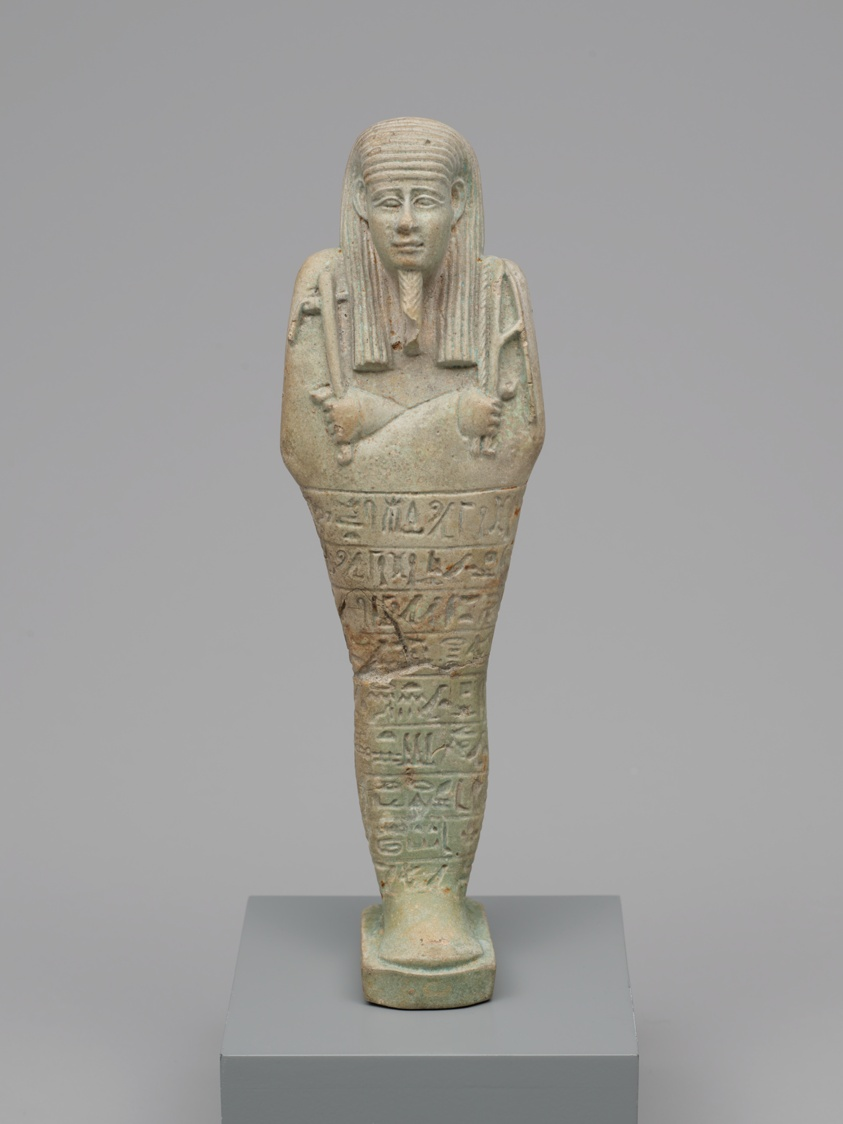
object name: Funerary Object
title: Ushabti (Funerary Figurine) of Horudja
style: late period (egyptian), twenty-ninth dynasty, thirtieth dynasty, egyptian, ancient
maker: Egyptian; Hawara, Egypt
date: Late Period, Dynasty 30 (380–343 BCE)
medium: Faience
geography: Egypt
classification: ushabti; figurine; funerary; ceramics; ancient art; faïence (composite material)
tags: mummies, Hieroglyphs, agriculture